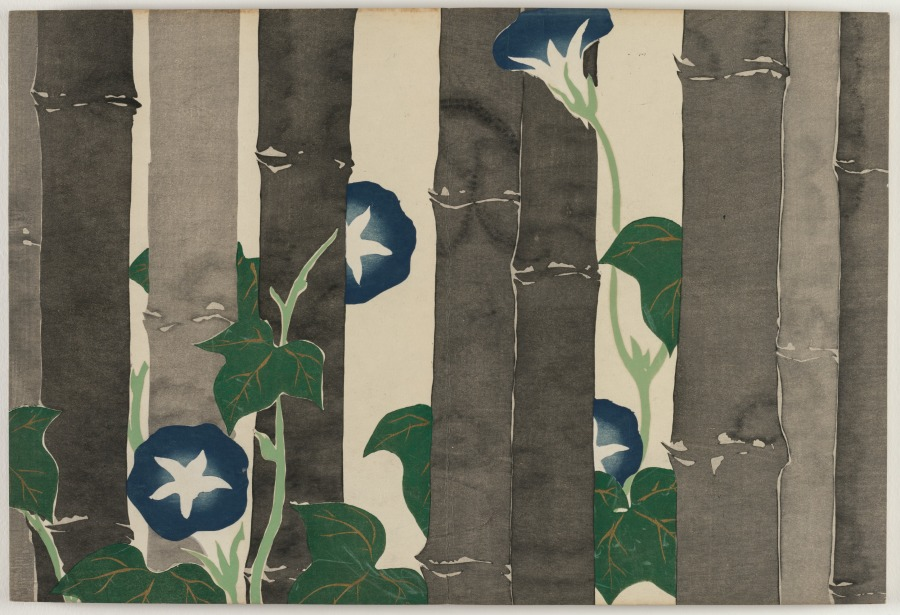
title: Flowers of a Hundred Worlds (Momoyogusa): Morning Glories (Asagao)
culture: Japan, Meiji period (1868–1912)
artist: Kamisaka Sekka (Japanese, 1866–1942)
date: 1909–10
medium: color woodcuts with gold and silver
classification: Bound Volume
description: This print from a set of three woodblock printed albums displays the graphic design prowess of Kamisaka Sekka. The images were first distributed one by one to subscribers to the series but later were reissued in bound form, like this book, for mass consumers. Each print features a vignette taken from nature or Japanese literature. Many of the scenes have a long history in Japan, originating in the 900s or 1000s and having been interpreted by all manner of artists since that time. Sekka’s selections hew closely to precedents from the Rinpa style originated by painter Tawaraya Sōtatsu (c. 1570–c. 1640) and calligrapher Hon’ami Kōetsu (1558–1637).